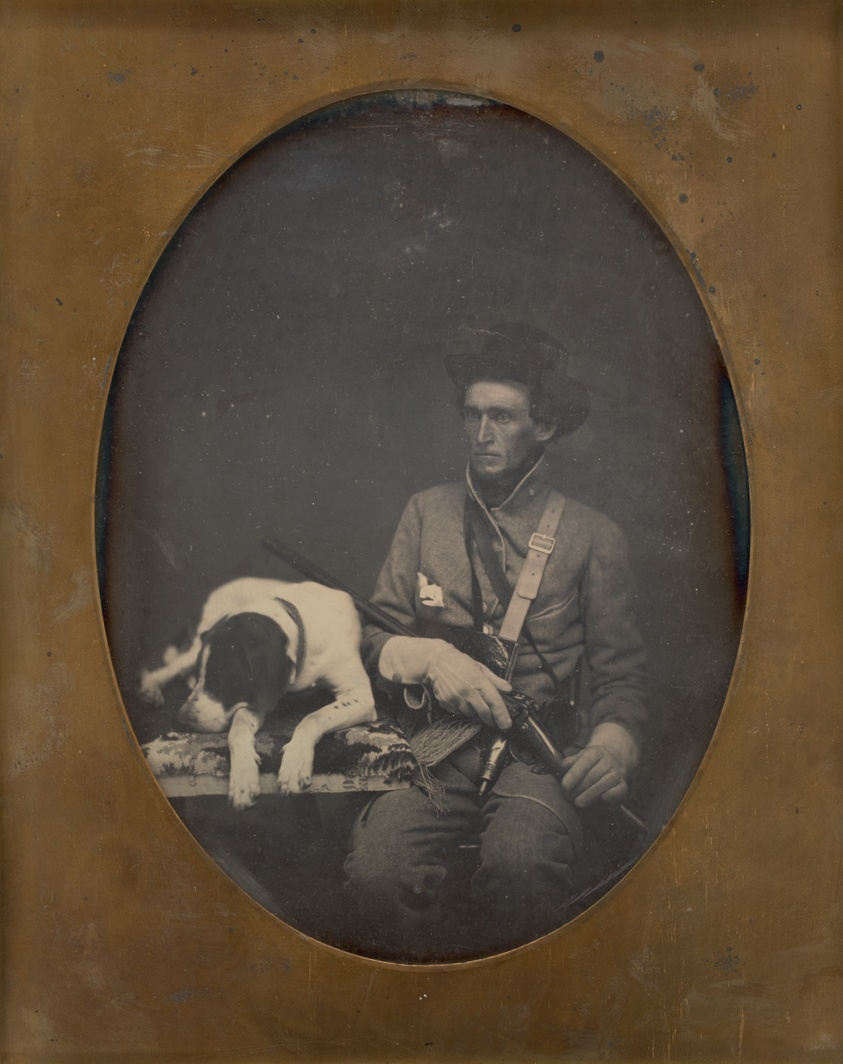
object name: Photograph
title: Untitled (Portrait of a Seated Man in Soldier Uniform with a Dog Lying to the Left of him)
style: 19th century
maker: Unknown maker; American, 19th century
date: 1855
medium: Daguerreotype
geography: United States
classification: photography; daguerreotype; portrait; portrait; photograph; photographic process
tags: lundberg collection, men, portraits: male subject, portraits: multiple subjects, portraits, portrait